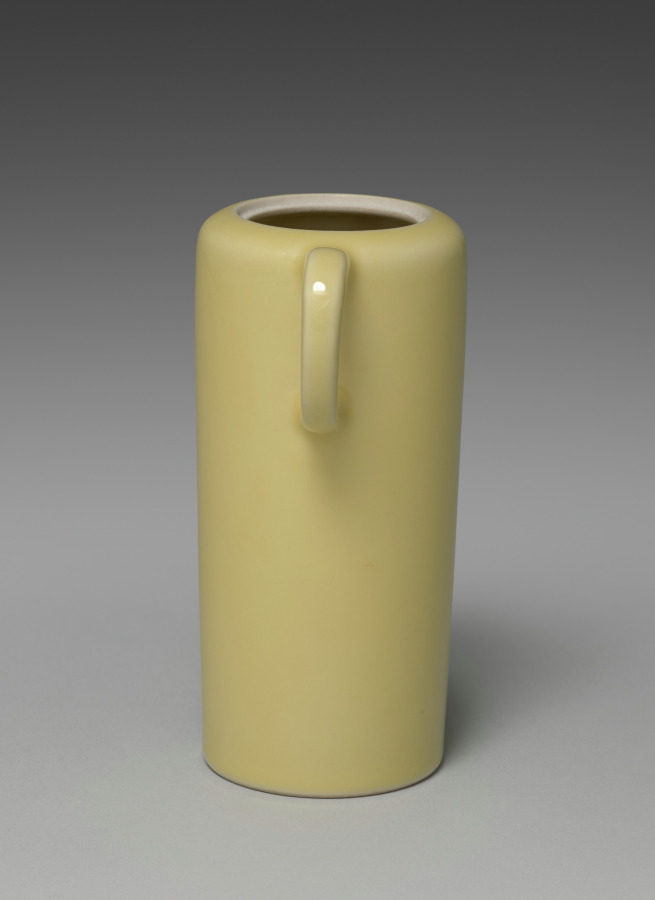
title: Sake Pourer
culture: Japan, Taishō period (1912–26) or Shōwa period (1926–89)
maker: Seifū Yohei IV (Japanese, 1872–1951)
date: 1914–46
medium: Porcelain with yellow glaze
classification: Ceramic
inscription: 清風造 。 【印】 清風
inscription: 成山清風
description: Like his father, Yohei IV also produced works with red or yellow monochrome glazes. His yellow-glazed works include this pair of sake pourers, a set of five drinking cups CMA 2022.217, and a sweets bowl molded into the shape of a chrysanthemum CMA 2022.218.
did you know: The lid's handle is made of bamboo.